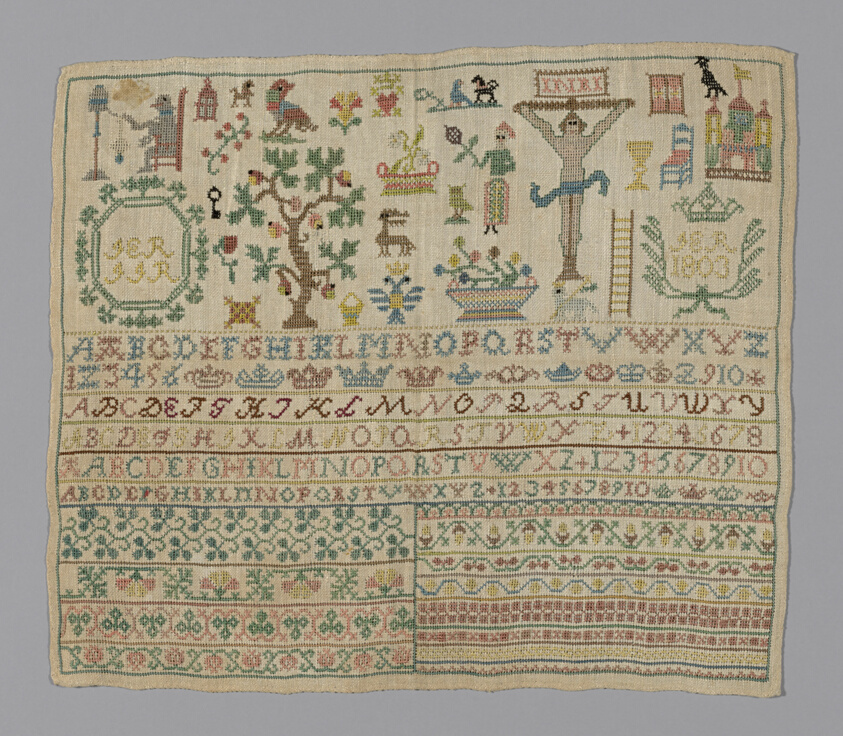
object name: Textile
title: Sampler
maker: Germany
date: 1803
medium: Linen, plain weave; embroidered with silk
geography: Germany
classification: textile; needlework (visual works)